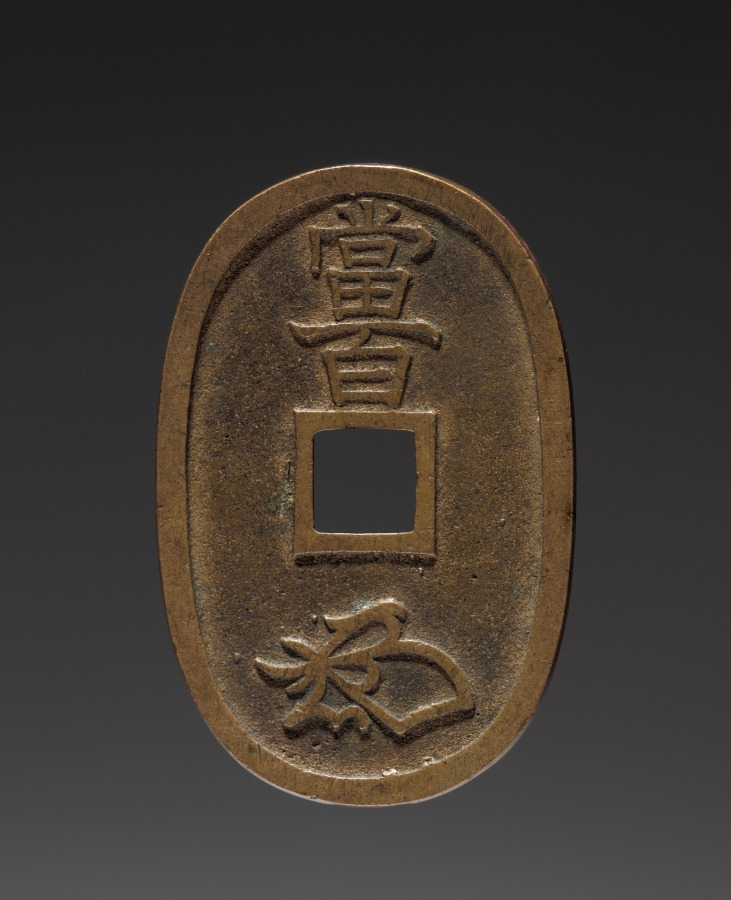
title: Tenpō Tsūhō Coin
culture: Japan, Edo period (1615–1868)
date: 1835–68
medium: copper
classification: Coins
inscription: 天保通寶